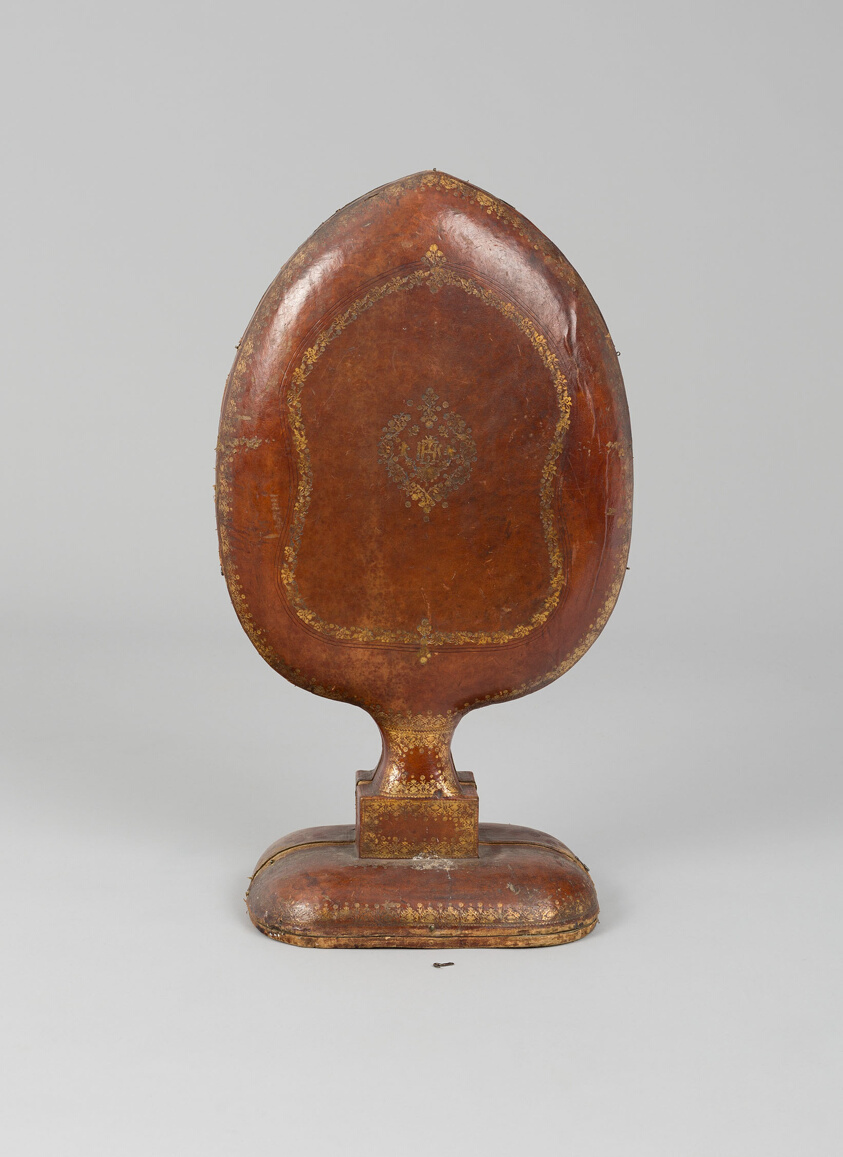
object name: Metalwork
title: Monstrance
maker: Joseph Moser (Austrian, active 1762)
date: 1762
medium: Silver gilt, beveled glass surrounded by seimprecious red, green, blue stones and clear paste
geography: Vienna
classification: silver; metalwork; european decorative arts